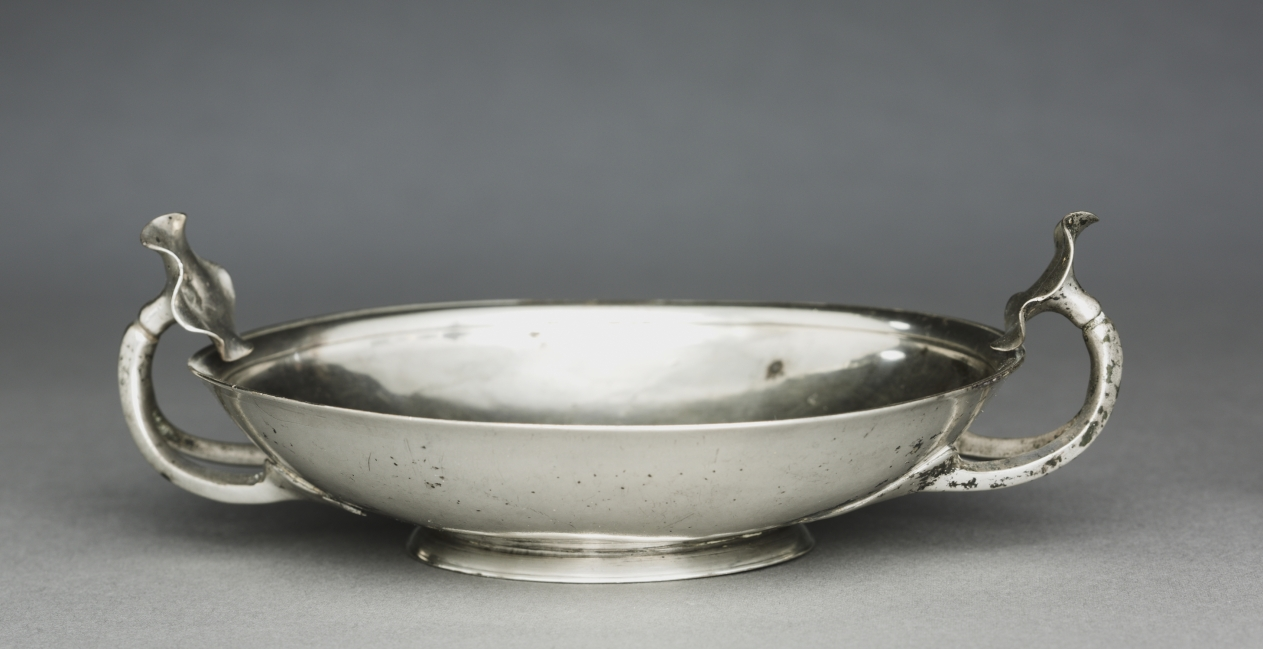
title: Stemless Kylix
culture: Greece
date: c. 200s BCE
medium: silver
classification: Metalwork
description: Constructed out of a double shell of silver attached at the rim of the vessel, this shallow cup is an elegant example of Greek silversmithing. A pair of wishbone handles, one on each side of the cup, are decorated with leaves at their base and poppy flowers on top. A small, pointed dimple projects from the center of the interior. Originally, this cup would have been used as a drinking vessel during banquets.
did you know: Poppies and their derivative, opium, were used in the ancient Mediterranean as an analgesic and to treat insomnia.